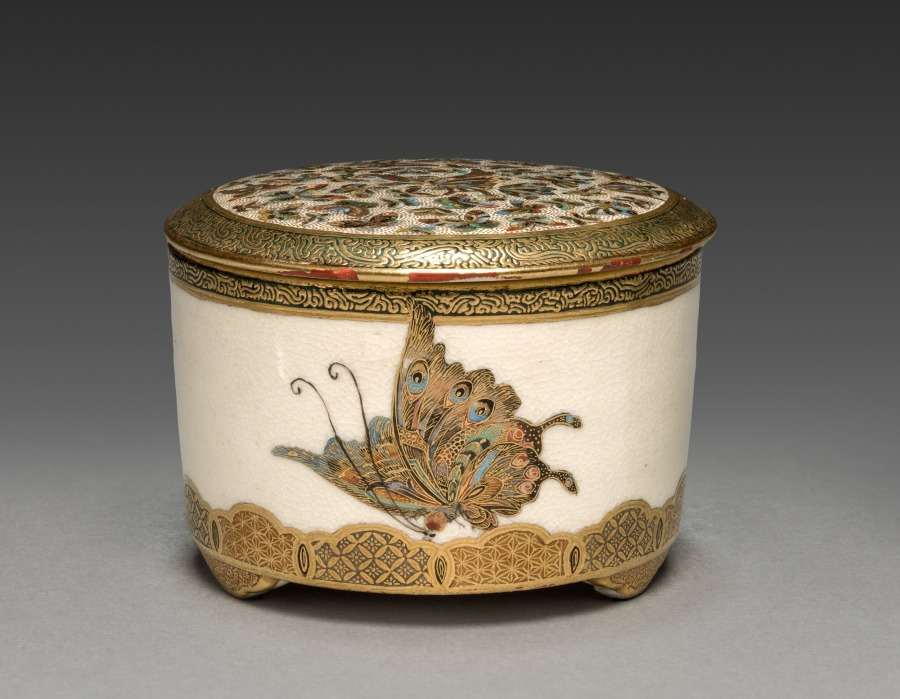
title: Jar with Butterflies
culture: Japan, Meiji period (1868–1912)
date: late 1800s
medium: porcelain (Satsuma ware)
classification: Ceramic